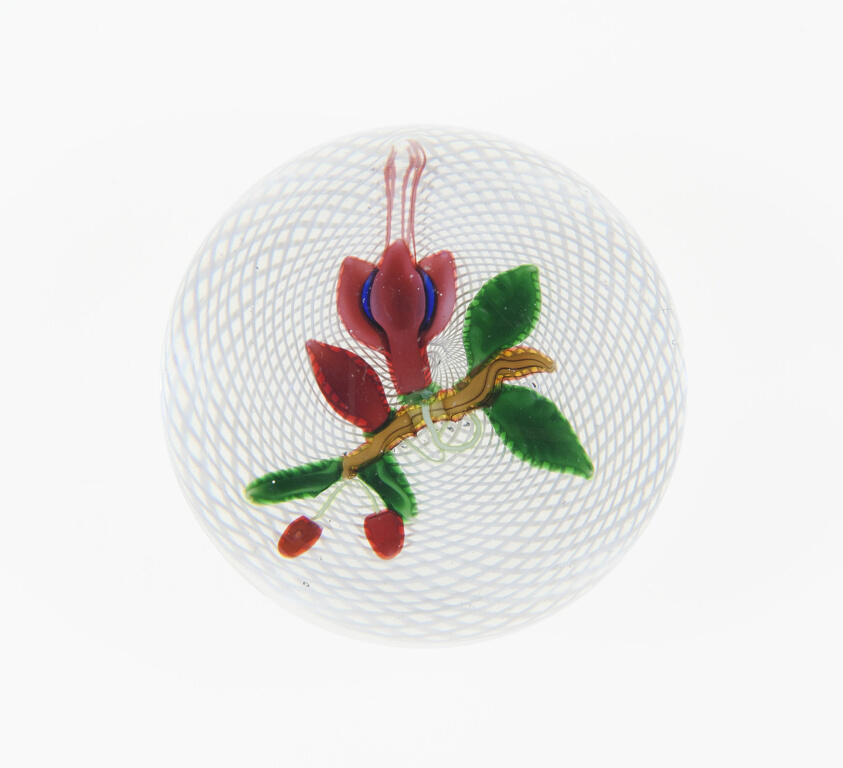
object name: Glass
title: Paperweight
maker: Saint-Louis Glassworks (Cristalleries de Saint-Louis); Lorraine, France, founded 1586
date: c. 1848–55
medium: Glass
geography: Saint-Louis-lès-Bitche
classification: paperweight; glass